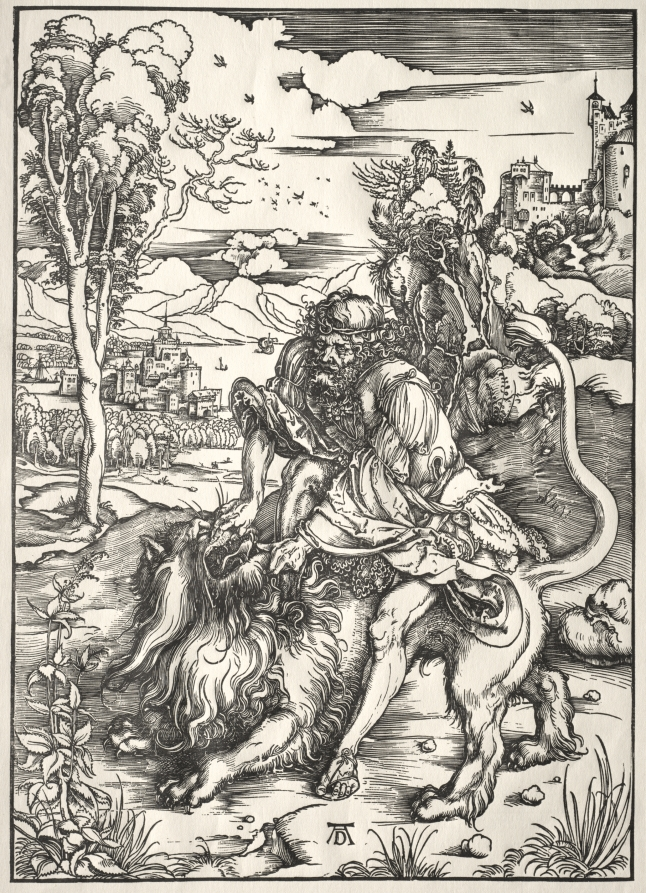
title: Samson and the Lion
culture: Germany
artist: Albrecht Dürer (German, 1471–1528)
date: c. 1497–98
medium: woodcut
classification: Print